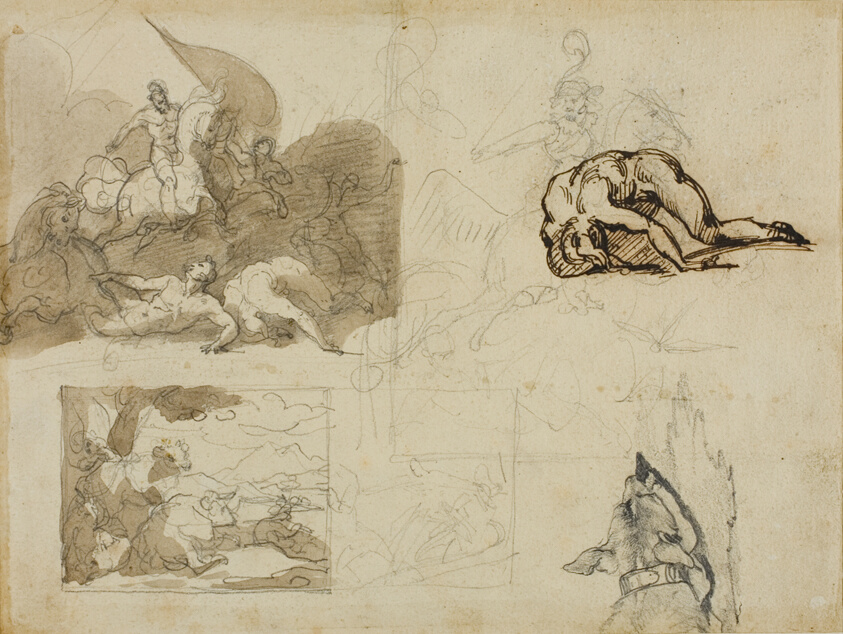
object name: Drawing and Watercolor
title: Sketches of a Cavalry Battle, A Landscape with Cows, and Other Compositions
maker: Jean Louis André Théodore Géricault (French, 1791-1824)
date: c. 1814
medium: Graphite, pen and brown ink, and brush and brown wash on cream wove paper, perimeter mounted on ivory laid paper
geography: France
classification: drawings (visual works); prints and drawing